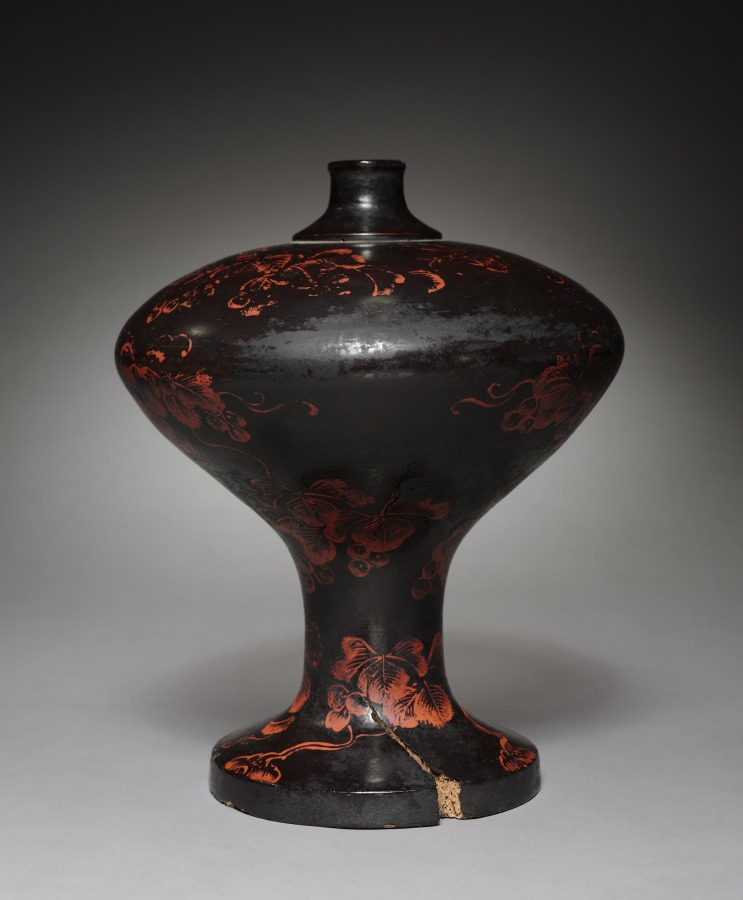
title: Sake Flask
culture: Japan, Muromachi period (1392–1573)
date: 1500s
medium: Black laquered wood with red lacquer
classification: Lacquer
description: This flask contained rice wine, or sake. Its wood body was shaped by a lathe before black lacquer was applied to the surface. A red lacquer design of grapevines, an auspicious motif, covers the surface. With their numerous, long-lasting fruits, grapevines traditionally symbolized fertility and longevity in East Asia.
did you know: The evocative imagery of brushed leaves and bunches of grapes suggest that the artist referred to a particular painting when decorating this vase.